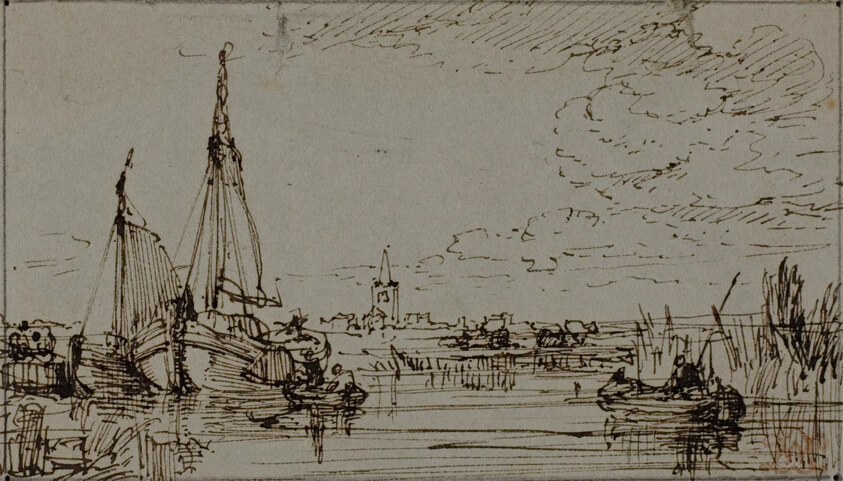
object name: Drawing and Watercolor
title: On the Thames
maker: William Leighton Leitch (Scottish, 1804-1883)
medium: Pen and brown ink on ivory wove paper, laid down on board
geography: Scotland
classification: pen and ink drawings; drawings (visual works); prints and drawing